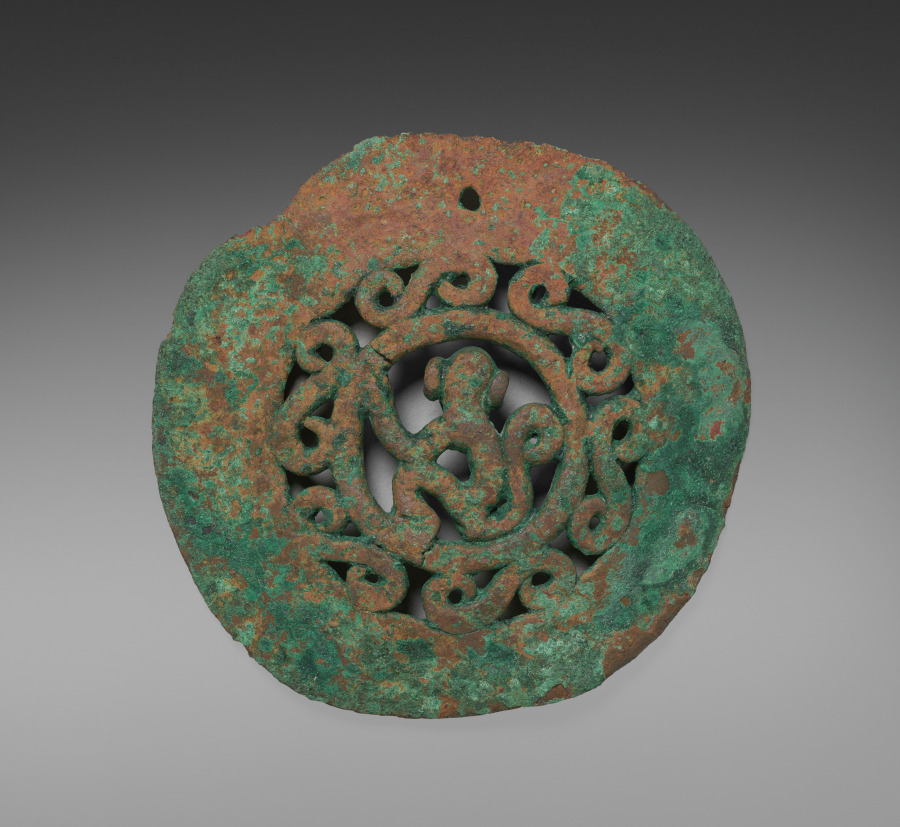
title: Medallion, beads, and spindle whorls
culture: Central Andes, North Coast, Chimú (medallion)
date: 1000–1532 (medallion)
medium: bronze, copper, silver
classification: Jewelry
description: This medallion and dozens of smaller beads and spindle whorls arrived at the museum strung on modern cord. Pierced with a hole at the top, it could have been suspended from a necklace or attached to a backing, such as a textile. It comes from Peru’s north coast and was made in the late pre-Hispanic period; the dates of the smaller beads are less clear.